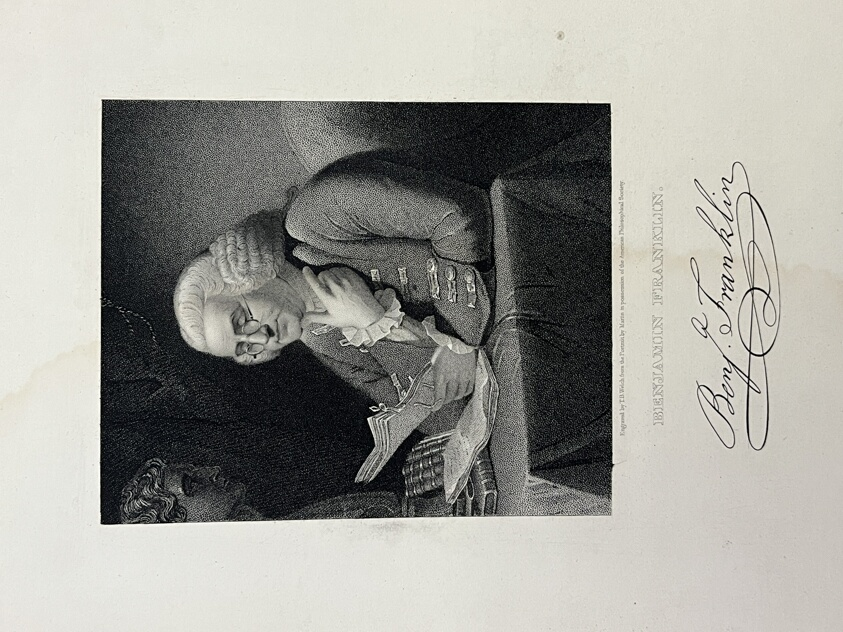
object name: Print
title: Benjamin Franklin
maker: Thomas B. Welch (American, 1814-1874); after Martin (likely American, 19th century)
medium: Stipple engraving on paper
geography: United States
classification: reproduction; print; prints and drawing